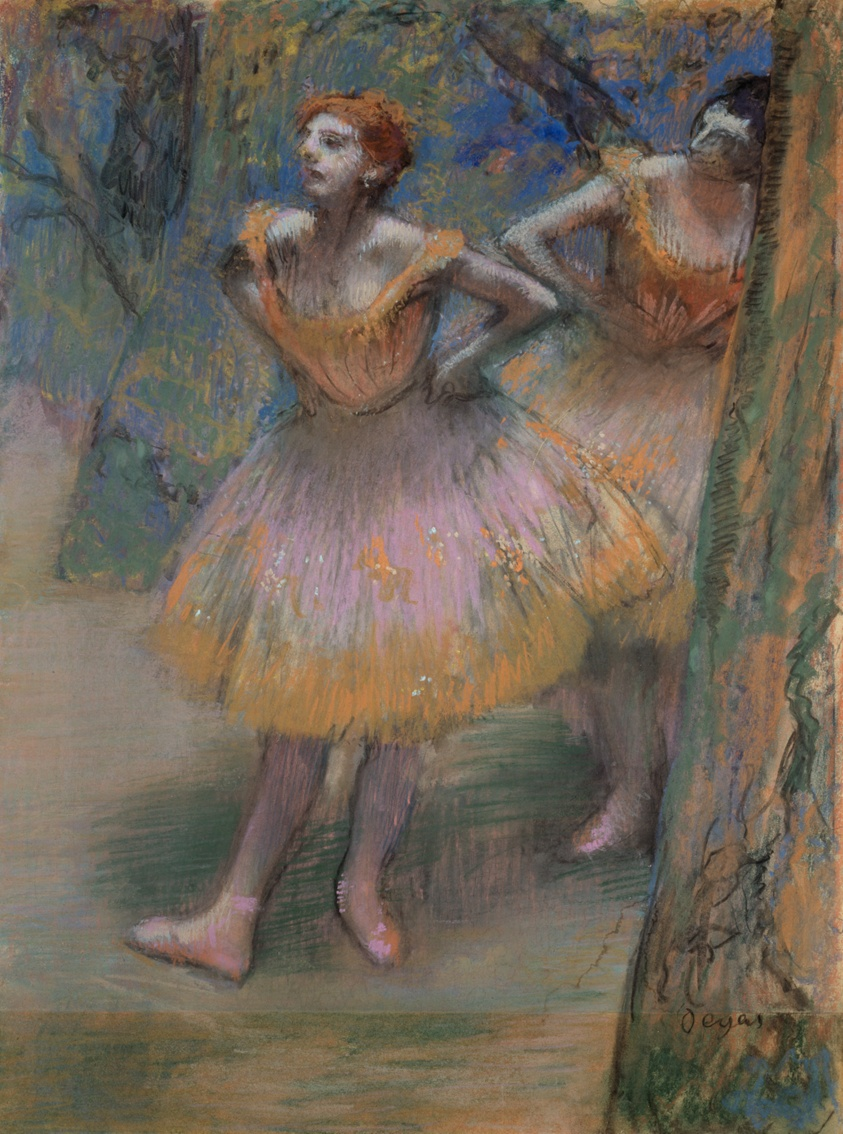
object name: Drawing and Watercolor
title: Two Dancers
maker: Edgar Degas; French, 1834-1917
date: c. 1893–98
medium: Pastel and charcoal, with stumping and burnishing, on tracing paper, pieced and laid down on cardboard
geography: France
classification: pastel; drawings (visual works); prints and drawing; paper